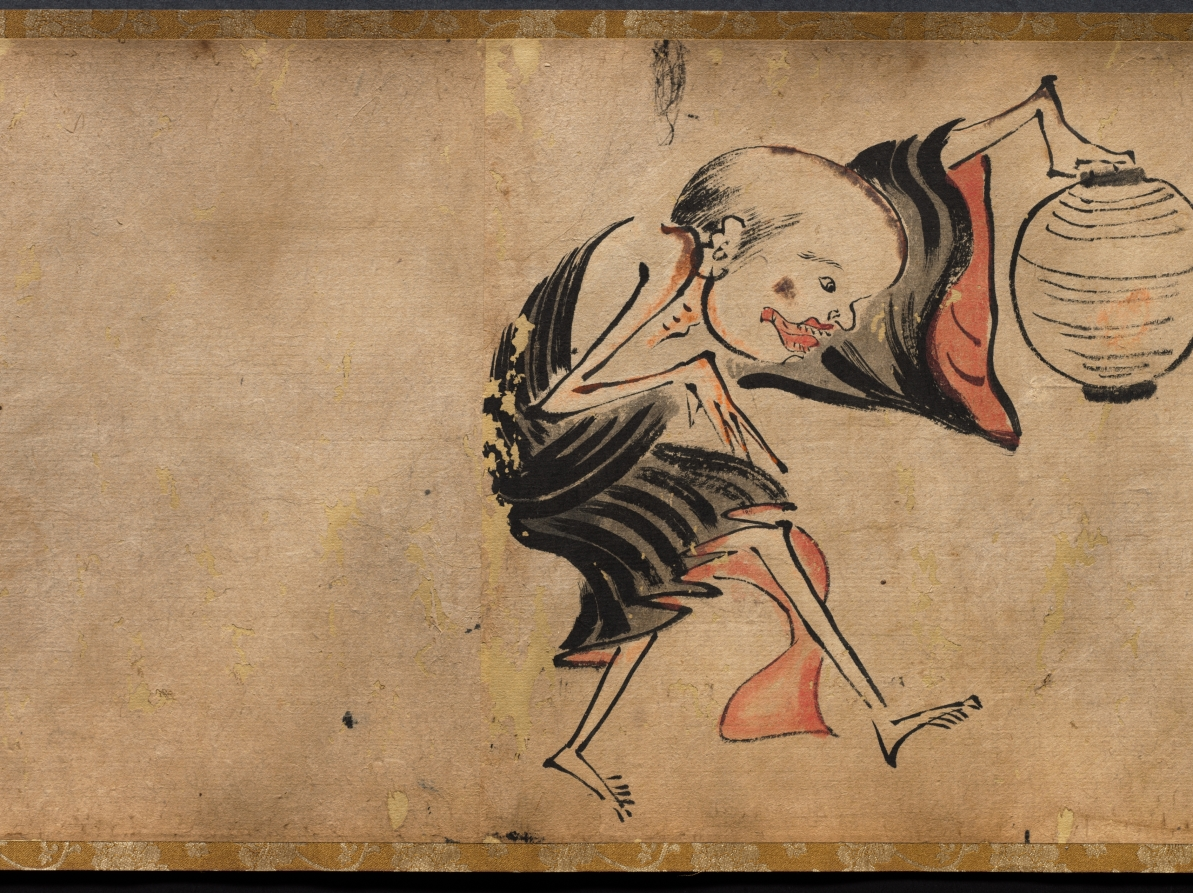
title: The Illustrated Tale of Oishi Hyōroku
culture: Japan, Edo period (1615–1868)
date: 1700s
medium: handscroll; ink and color on paper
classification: Painting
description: This incomplete handscroll illustrates part of the story of Oishi Hyoroku, a young man tasked with battling fox apparitions who were creating problems in his town. In other extant versions of the scroll, the story is set in the fall of 1624 in Kagoshima in southern Japan. Throughout the story, Hyoroku is tricked and terrified by the foxes that shift their shapes into a variety of monstrous phantoms. After repeated humiliations, he eventually captures two of the foxes. In this version, colloquial texts that function like text blurbs in comics appear throughout the scroll, but the main text is missing.